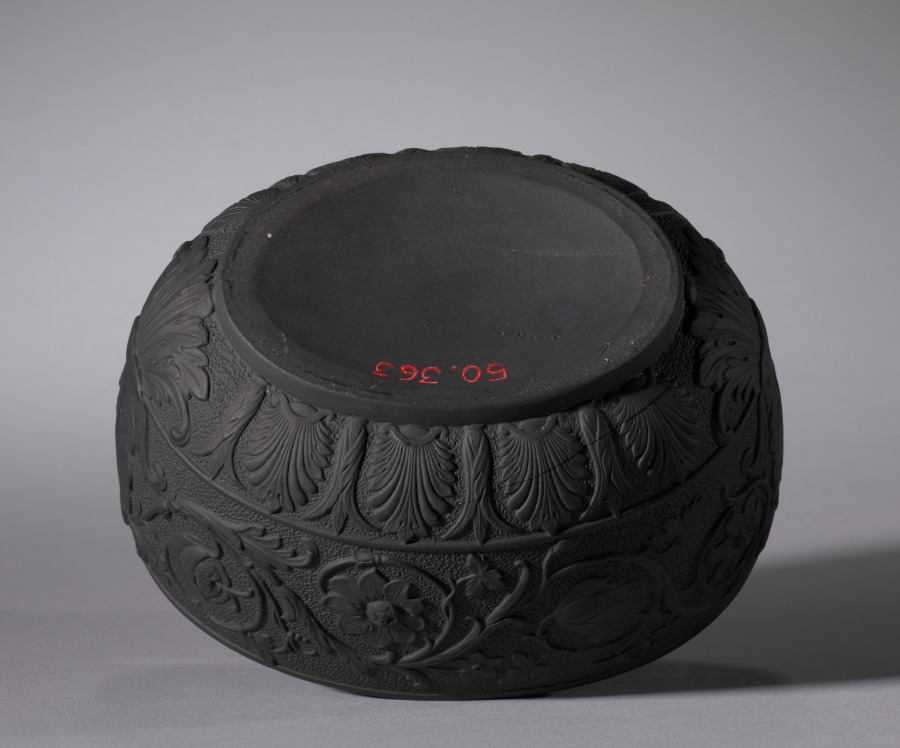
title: Teapot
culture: England, 19th century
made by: Elijah Mayer (British, c. 1770–1805)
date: c. 1810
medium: black basalt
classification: Ceramic